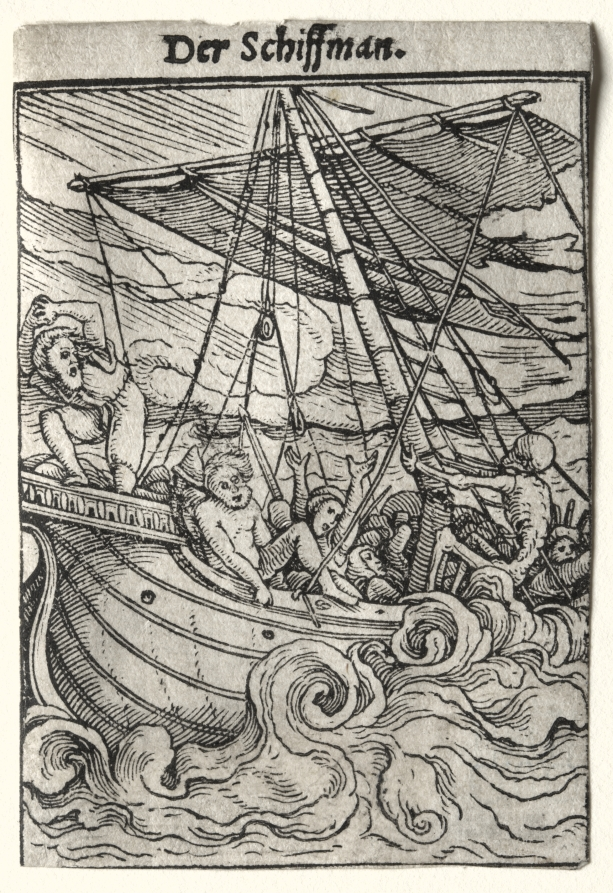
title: Dance of Death: The Sailor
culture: Germany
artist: Hans Holbein the Younger (German, active England and Switzerland, 1497/98–1543)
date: c. 1526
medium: woodcut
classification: Print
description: Dance of Death is the most celebrated series of woodcuts designed by Holbein. The forty-one blocks were cut by Hans Lützelburger in the years immediately before his death in 1526, though the set was not published until 1538. Dance of Death originated as a drama in the middle of the 14th century. Following widespread epidemics such as the black plague, these plays took place in a cemetery or churchyard. Actors, dressed in pale costumes painted to resemble skeletons, personified Death and summoned a group of people from all social classes in a dancelike procession. In a period when the life span was short, the purpose of the Dance of Death was to remind the populace to prepare for the Last Judgement.